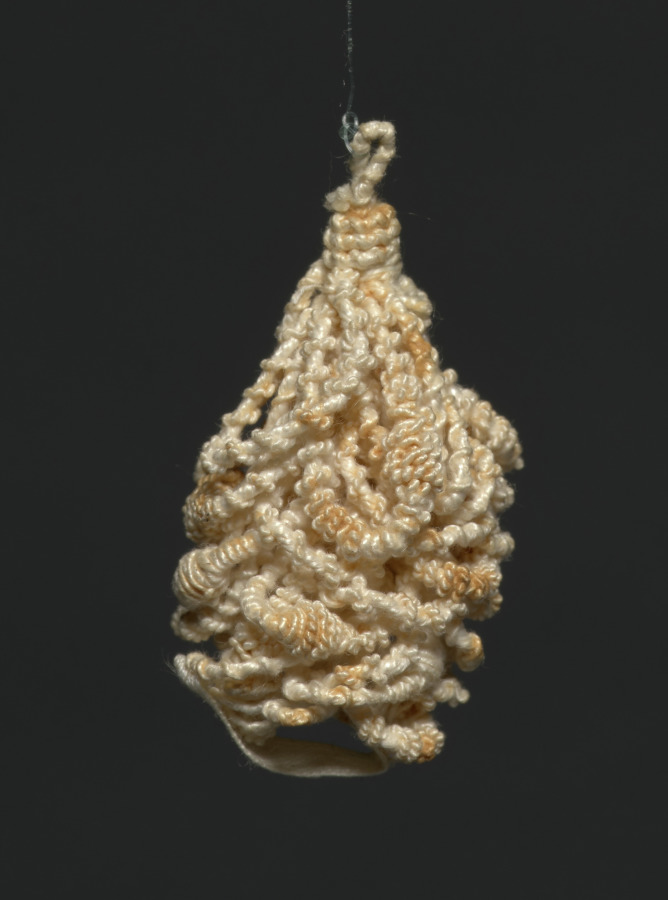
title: Lace Tassel (one of a pair)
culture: Italy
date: 1560–99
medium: lace (wrapping)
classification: Lace